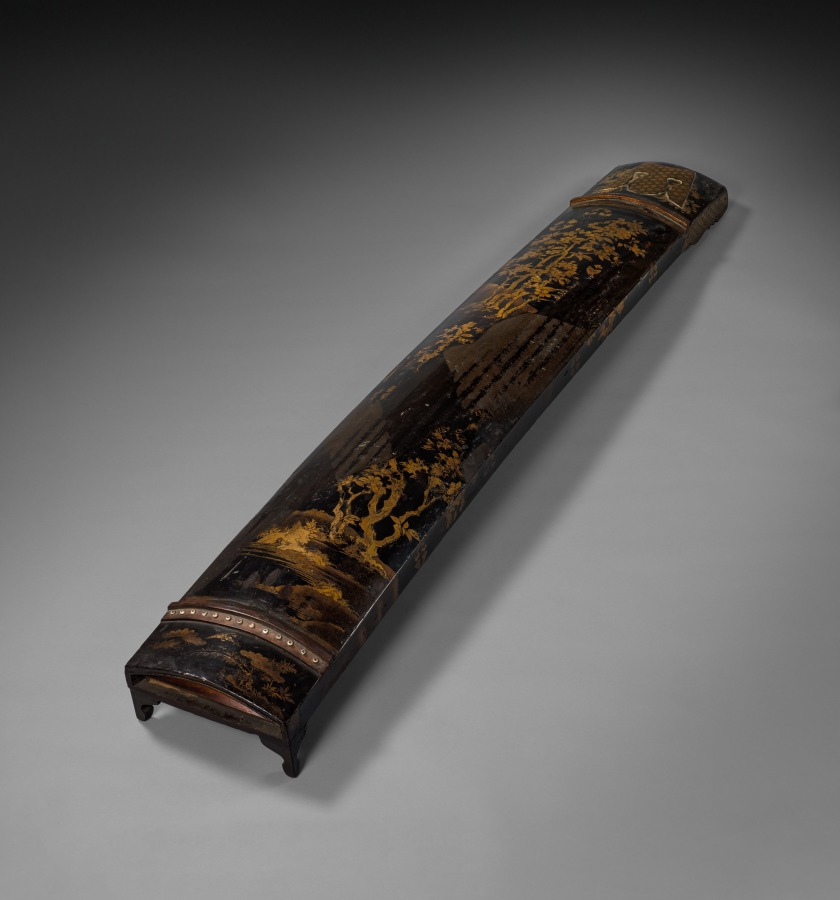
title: Koto (Zither)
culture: Japan, Edo period (1615–1868)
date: early 1600s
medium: gold, silver, and black lacquer on wood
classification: Lacquer